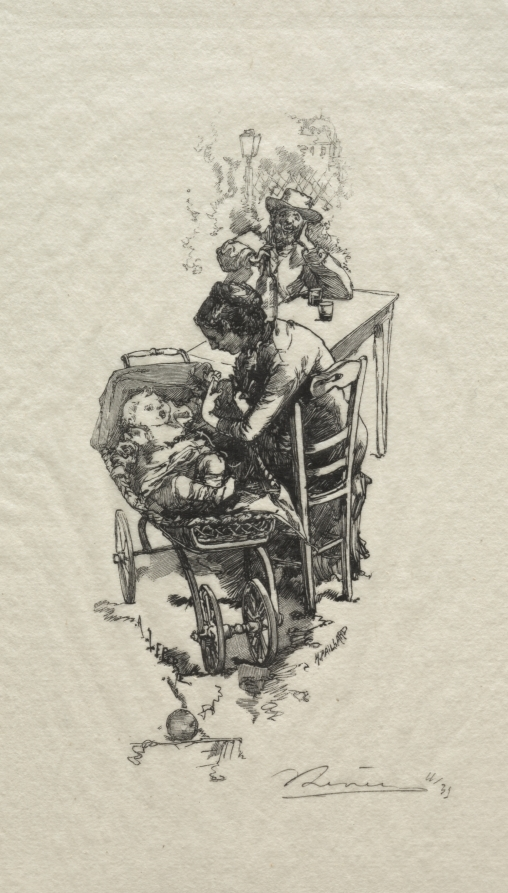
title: La femme au berceau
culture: France, 19th-20th century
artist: Auguste Louis Lepère (French, 1849–1918)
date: c. 1870–1918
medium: wood engraving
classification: Print